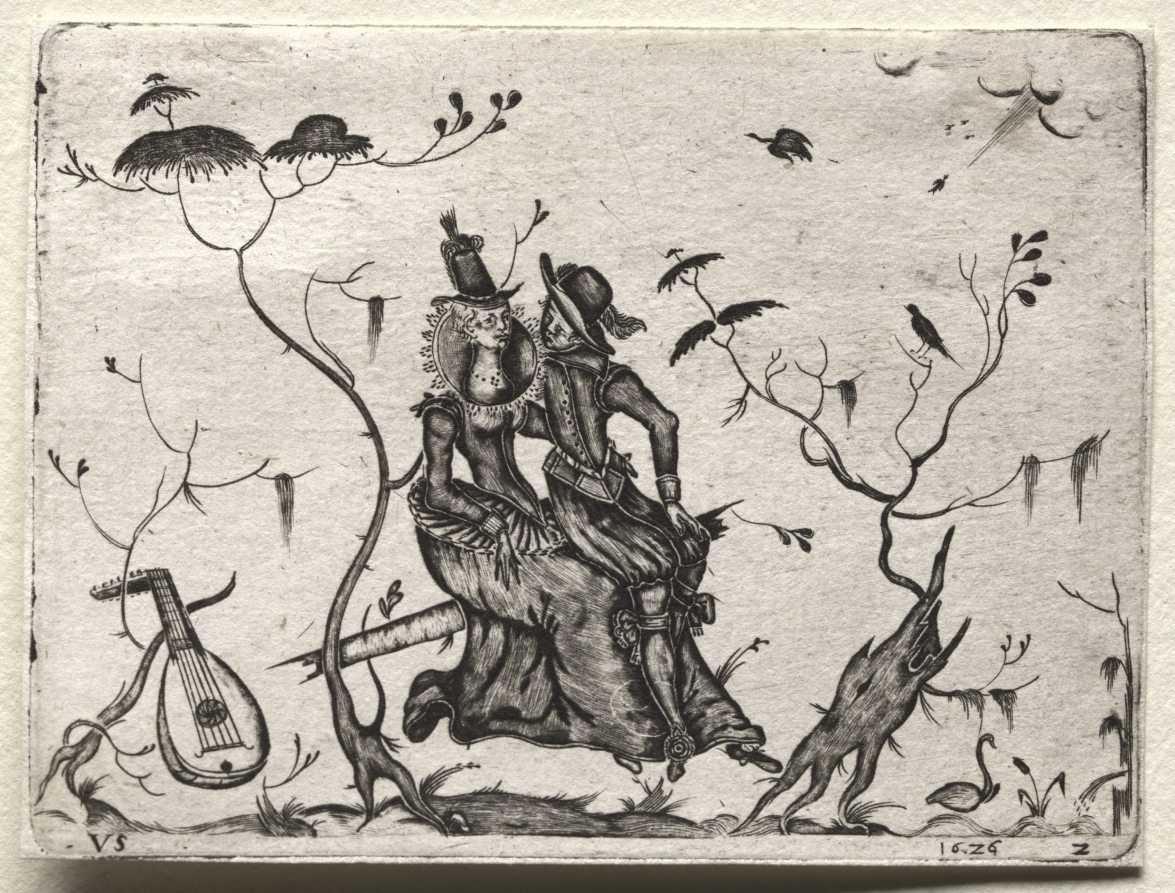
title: Pair of Lovers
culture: Germany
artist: Valentin Sezenius (German)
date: 1626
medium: engraving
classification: Print